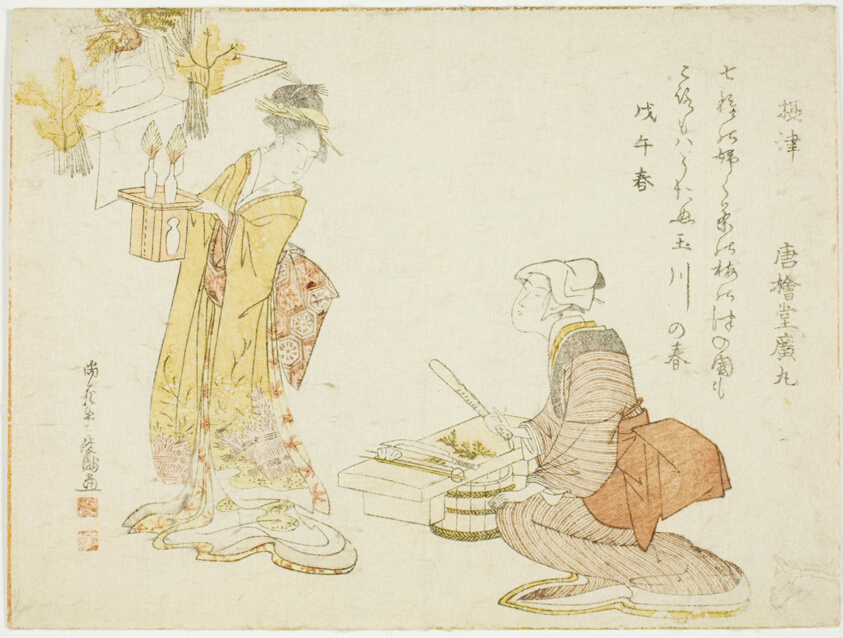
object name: Print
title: Preparing Seven Herbs on the Seventh Day of the New Year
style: Japanese (culture or style)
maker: Kubo Shunman (Japanese, 1757–1820)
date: 1798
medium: Color woodblock print; surimono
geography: Japan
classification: woodblock print; print; asian art